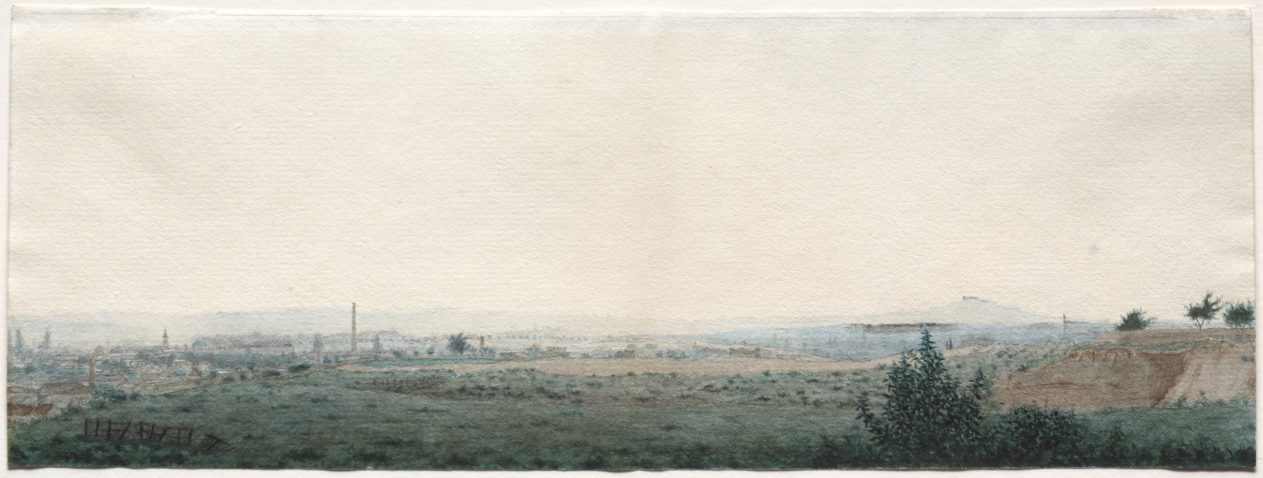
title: Landscape Near Paris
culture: France, 19th century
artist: Léon Bonvin (French, 1834–1866)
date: c. 1860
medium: watercolor, gouache, and graphite on cream laid paper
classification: Drawing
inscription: VERSO, center, in black ink: 35.49. [upsidedown] ; ON A SEPERATELY APPLIED PIECE OF PAPER (now removed and in departmental file), inscribed in brown ink: 158. Vue panoramiq[cropped] / environs de Paris - aquarelle / Léon Bonvin.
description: In his delicate studies of flowers and fields, like this panoramic view of the distant Paris, Bonvin captured the beauty of nature, observed with an innocent, untrained eye. His untutored responses to nature permitted him to be more experimental than his contemporaries working in watercolor. A realist in his rendering of natural detail, Bonvin simultaneously foreshadowed Impressionism with his interest in light and atmosphere.